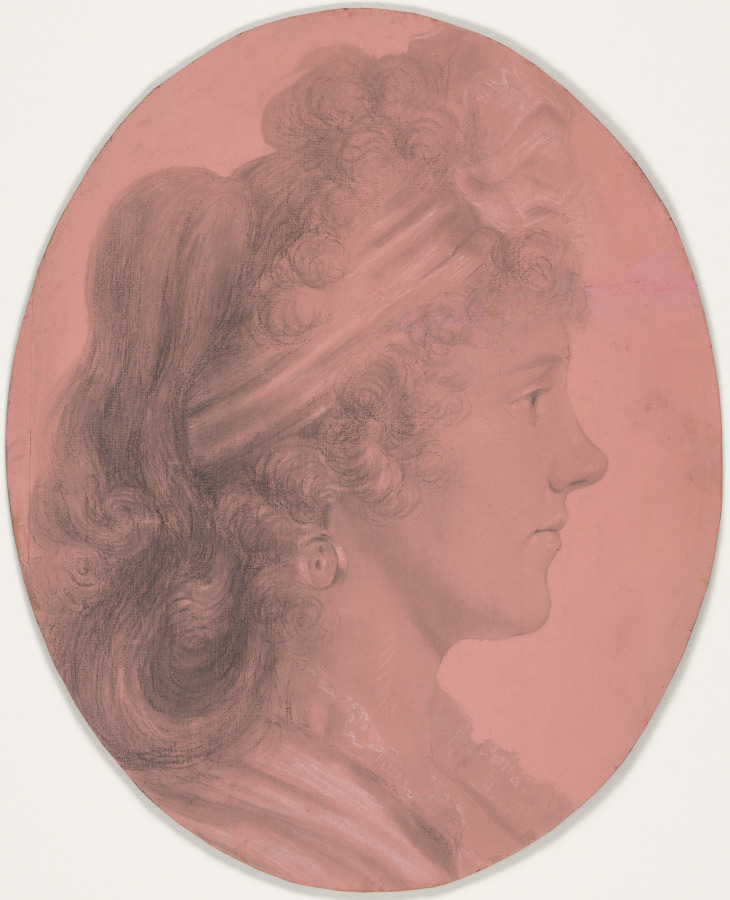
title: Portrait of Eleanor Ramsay Fitzwilliam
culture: France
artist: Charles Balthazar Julien Fevret de Saint-Mémin (French, 1770–1852)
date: c. 1790–1852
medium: Black and white chalk on buff paper with pink wash in original frame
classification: Drawing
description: This portrait and its pair (2024.35.1), depict George Fitzwilliam, an English merchant, and his American wife Eleanor Ramsay Fitzwilliam, who sat in New York for the French émigré artist Charles Balthazar Julien Févret de Saint-Mémin. Saint-Mémin used a recently invented mechanical device called a physiognotrace to trace accurate profiles of his sitters, which he then completed in black and white chalks. The technology enabled Saint-Mémin to establish a thriving business catering to prominent Americans—including Presidents Washington, Adams, Jefferson, and Madison, Benjamin Franklin, and several Native American chiefs—at a time when he was in exile from the French Revolution. As part of each commission, Saint-Mémin also supplied etchings of the portrait in a reduced size, which could be given as keepsakes to family and friends.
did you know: The physiognotrace device used to create this portrait consisted of a wooden frame within which a sitter posed in profile; the artist then peered through an eyepiece and followed the contour and features of the sitter’s face by maneuvering a graphite pencil attached to the mechanism.